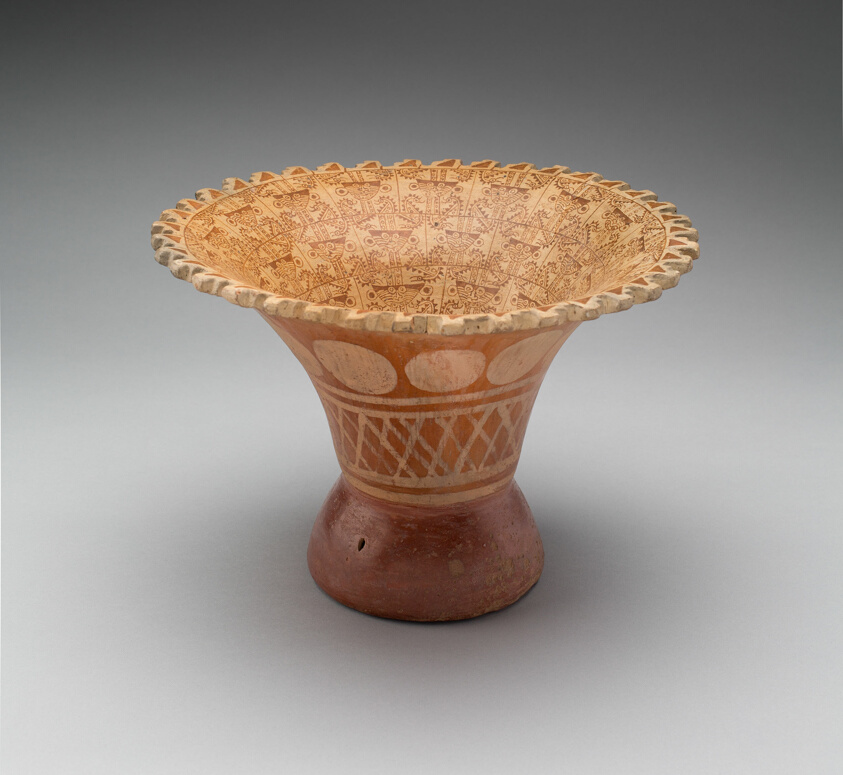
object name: Vessel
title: Flaring Bowl with Repeating Pattern of Abstract Figures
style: moche, mochica v, mochica, early intermediate period, Pre-Columbian, americas, andes, Arts of the Americas, andean, south american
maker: Moche (North coast, Peru)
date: 100 BCE–500 CE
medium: Ceramic and pigment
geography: Peruvian North Coast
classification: bowl; earthenware; art of the americas; ceramics; vessel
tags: abstract figures, serpents, masks, textile pattern